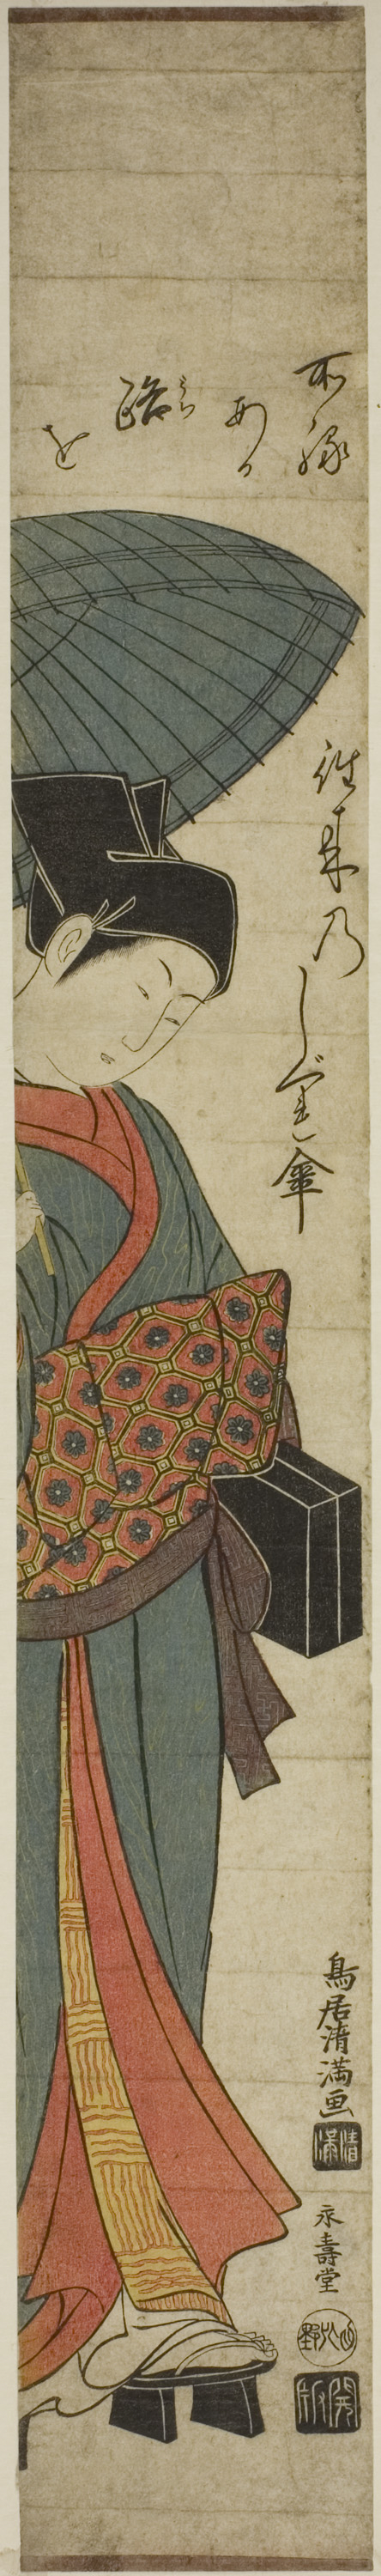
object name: Print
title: Woman with Blue Umbrella Carrying Black Box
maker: Torii Kiyomitsu; Japanese, 1735-1785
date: 1760s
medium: Color woodblock print; hashira-e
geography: Japan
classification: woodblock print; print; asian art